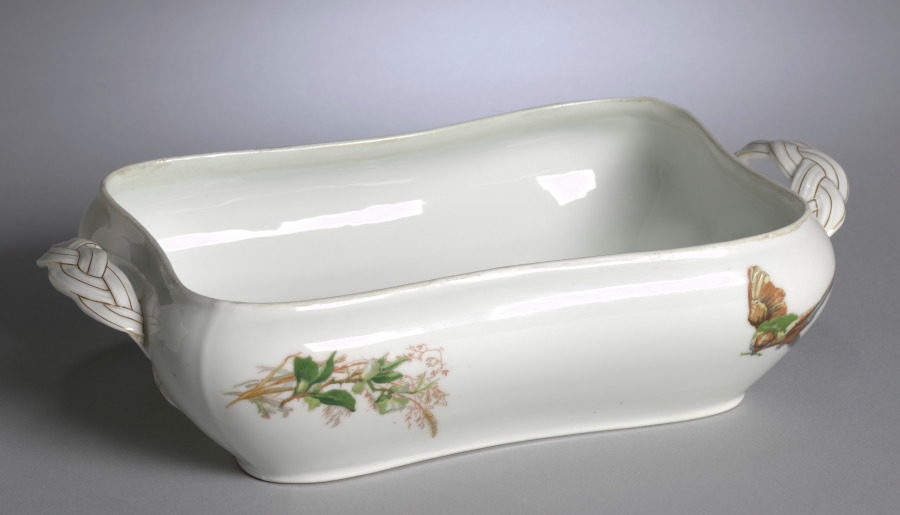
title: Vegetable Bowl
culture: France, Limoges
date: c. 1890–1910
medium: porcelain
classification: Ceramic